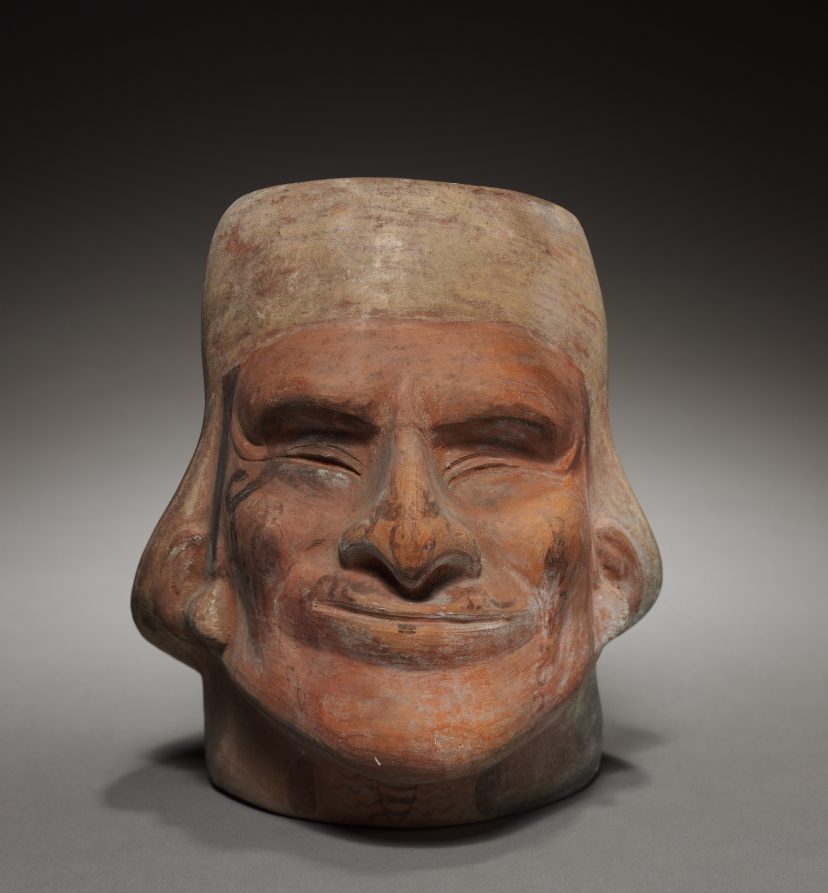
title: Vase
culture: Peru, Mochica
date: before 1930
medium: pottery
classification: Ceramic